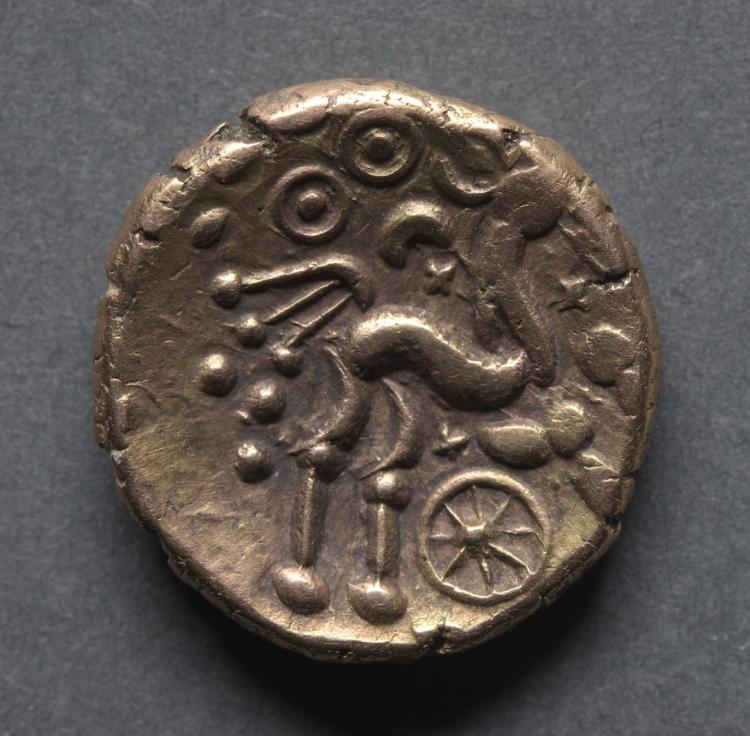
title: Stater: Horse, Wheel, and Crescent (reverse)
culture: England, Dobunni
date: 10 BCE–20 CE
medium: gold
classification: Coins